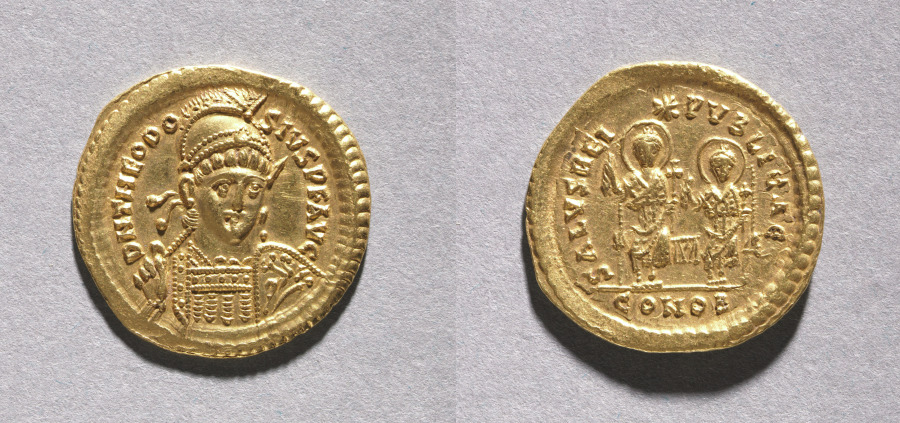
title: Solidus of Theodosius II and Valentinian III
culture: Byzantium, Constantinople, Byzantine period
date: 408–425 CE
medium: gold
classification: Coins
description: Byzantine Gold Coins The vast number of surviving Byzantine coins attests to the level of trade across the empire. Controlled and supervised by the emperor, the producers of coins took care to represent his authority and reflect his stature. Talented artists were recruited to engrave the dies (molds) used for the striking of coins. Emperors increasingly came to include their heirs and co-emperors on their coinage, as well as other family members or even earlier rulers. Coins were recognized, then as now, as small, portable works of art. With their inscriptions and images, Byzantine coins provide valuable documentation of historical events and a record of the physical appearance of the emperors. The coins shown here include the solidus, the basic gold coin of 24 karats; the tremissis, a gold coin of one-third the weight and value of the solidus; and the nomisma, which in the 10th century replaced the solidus as the standard gold coin.